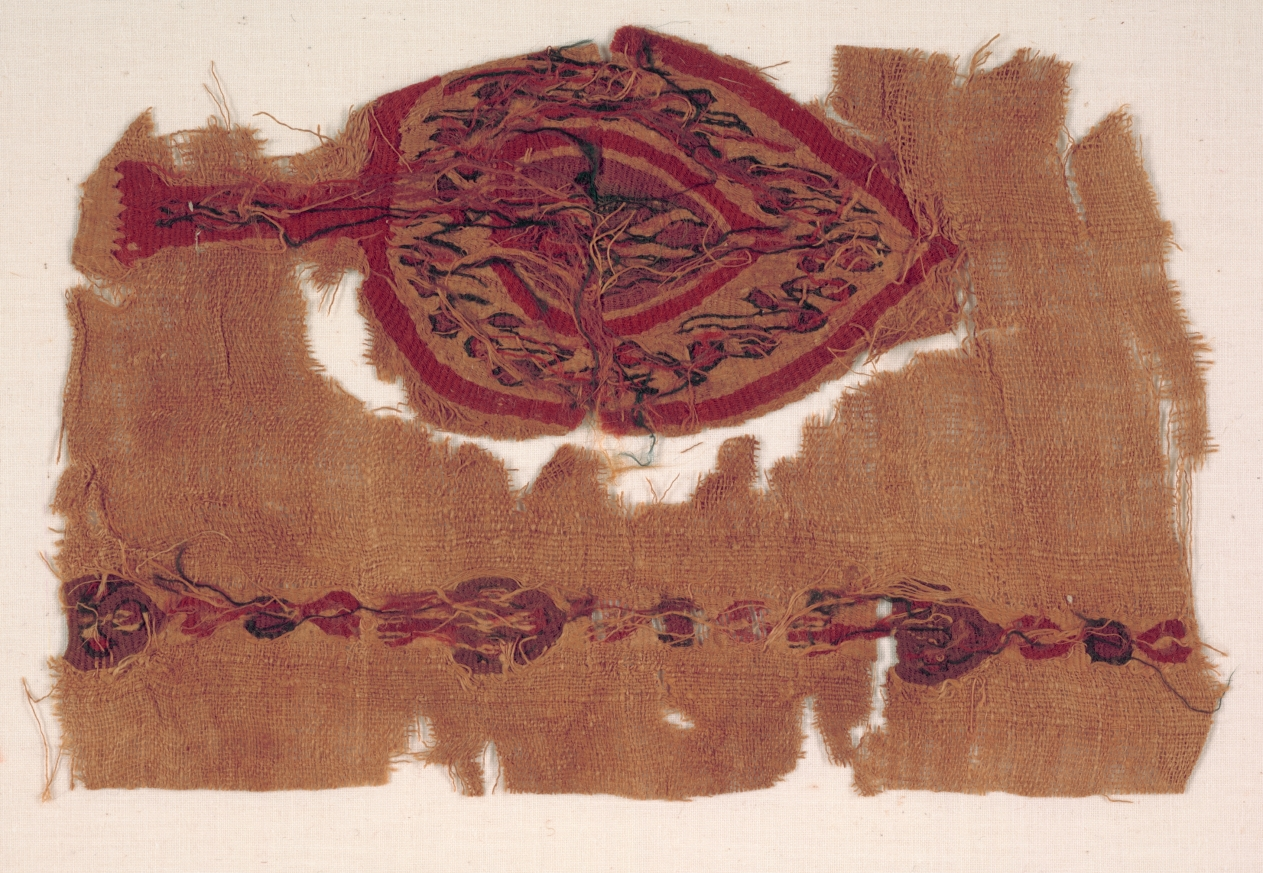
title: Fragment from a Curtain (?)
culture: Egypt, Byzantine period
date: 400s - 500s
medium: tabby weave with inwoven tapestry ornament, linen and wool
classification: Textile